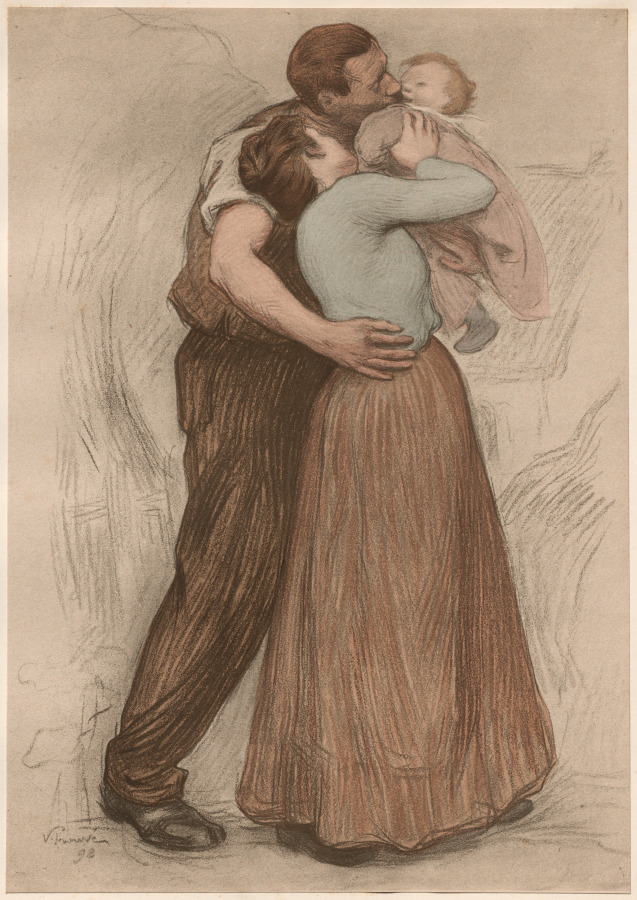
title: Le Baiser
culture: France, Paris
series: L'Estampe Moderne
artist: Victor Emile Prouvé (French, 1858–1943)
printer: Imprimerie Champenois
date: 1898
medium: Color lithograph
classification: Bound Volume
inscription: In plate: lower left corner of image: V. Prouvé / 98; lower right corner of secondary support: blindstamp of l'Estampe Moderne (Lugt 2790)